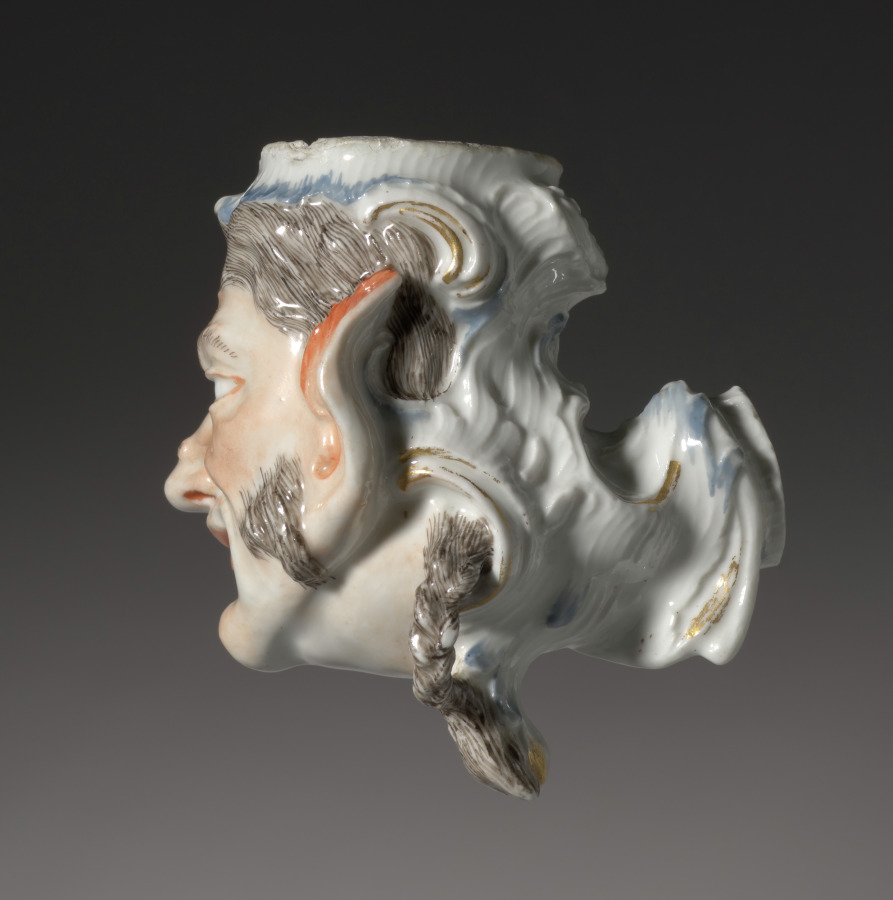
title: Pipe Head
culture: Germany, Nymphenburg, 18th century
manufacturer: Nymphenburg Porcelain Factory (German, founded 1747)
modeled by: Franz Anton Bustelli (Swiss, 1723–1763)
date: mid-1700s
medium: porcelain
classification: Ceramic